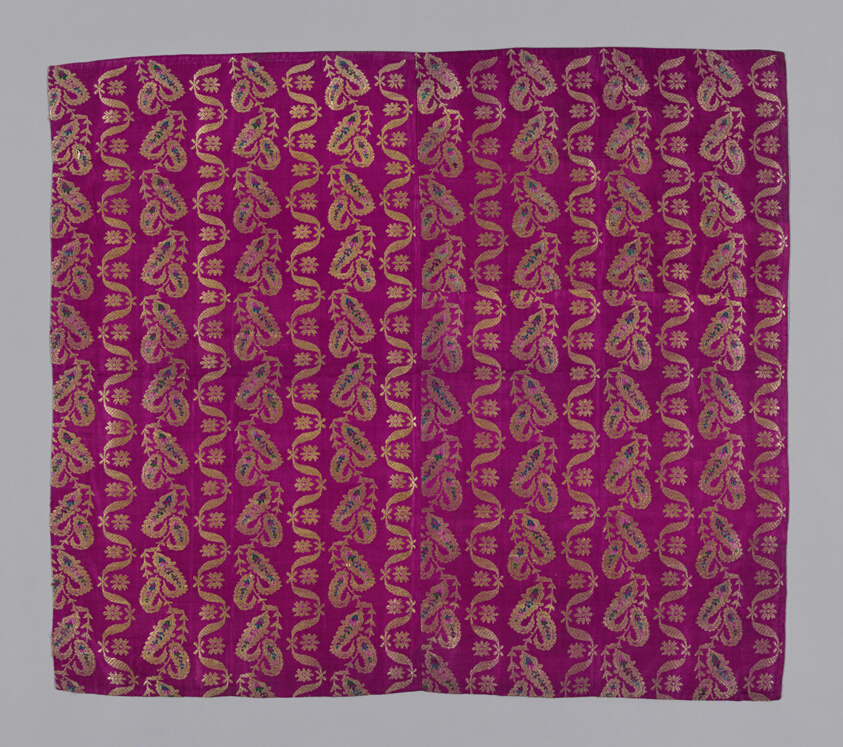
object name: Textile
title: Panel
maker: India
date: 19th century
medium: Red silk with vertical stripes of "cone" and ribbon design in gold and colored silk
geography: India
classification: textile; weaving